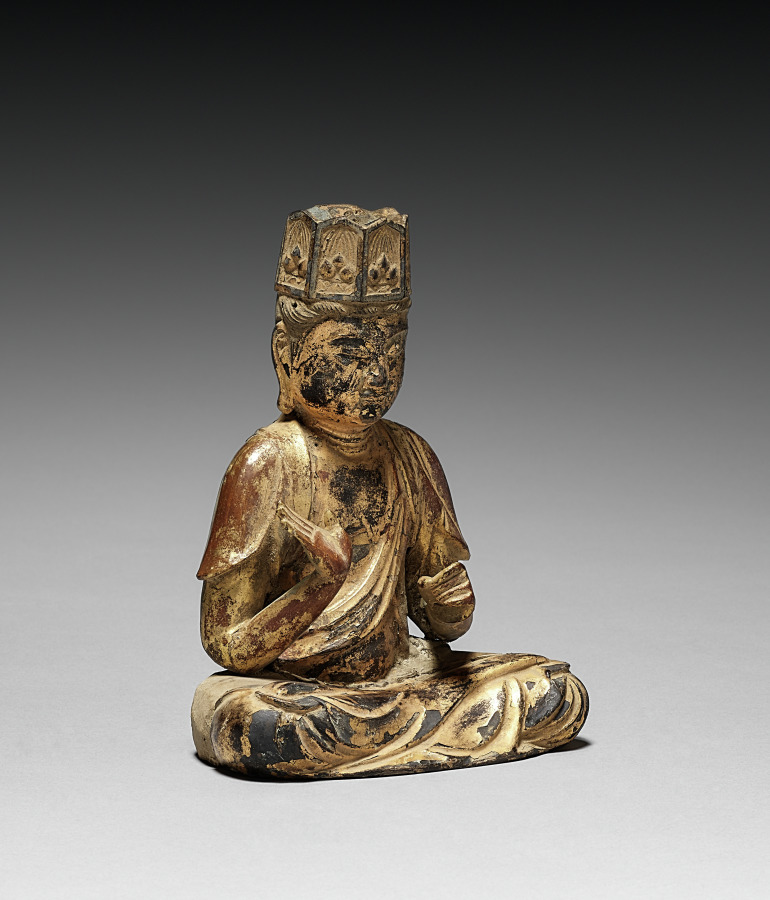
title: Bodhisattva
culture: Japan, Heian period (794–1185)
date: 900s-1100s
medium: gilded wood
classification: Sculpture